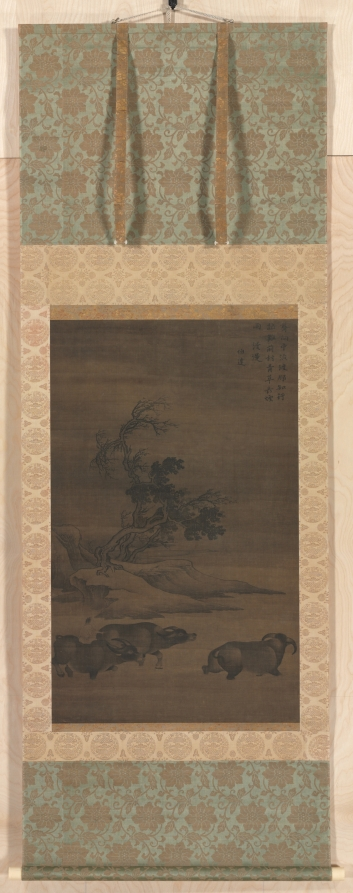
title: Herdboys and Buffalo in Landscape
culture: China, Qixian, Yuan dynasty (1271-1368)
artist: Guo Min (Chinese, mid-late 1200s)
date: 1200s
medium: Hanging scroll; ink on silk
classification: Painting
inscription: 齊向中流渡，那知行路難。/ 前村青草長，煙雨□漫漫。/ 伯達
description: Herdboys tend their buffalo in a bucolic landscape by a winding stream. Guo Min emphasizes the massive forms and mighty power of the animals, transforming them into forces of nature. The poem on this scroll reads: "Together, they wade through the middle of the stream, Mindless of perils in the journey. The grass grows tall in the village ahead, While the mist and rain spread far and wide."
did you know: Tending water buffalos has traditionally been the task of young boys and can still be seen in rural areas of Southern China today.